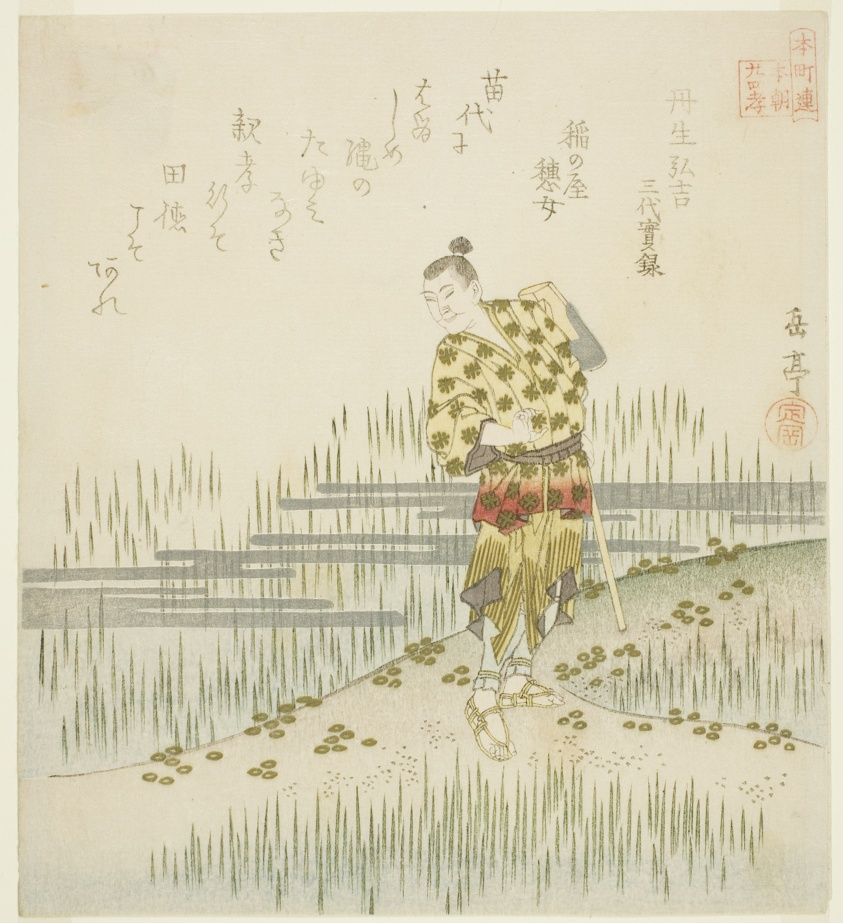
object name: Print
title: Nibu Hiroyoshi from the Veritable Records of Three Reigns (Nibu Hiroyoshi, Sandai jitsuroku), from the series "Twenty-four Japanese Paragons of Filial Piety for the Honcho Circle (Honchoren Honcho nijushiko)"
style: Japanese (culture or style)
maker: Yashima Gakutei (Japanese, 1786 (?)-1868)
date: c. 1821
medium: Color woodblock print; shikishiban, surimono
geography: Japan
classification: woodblock print; print; asian art